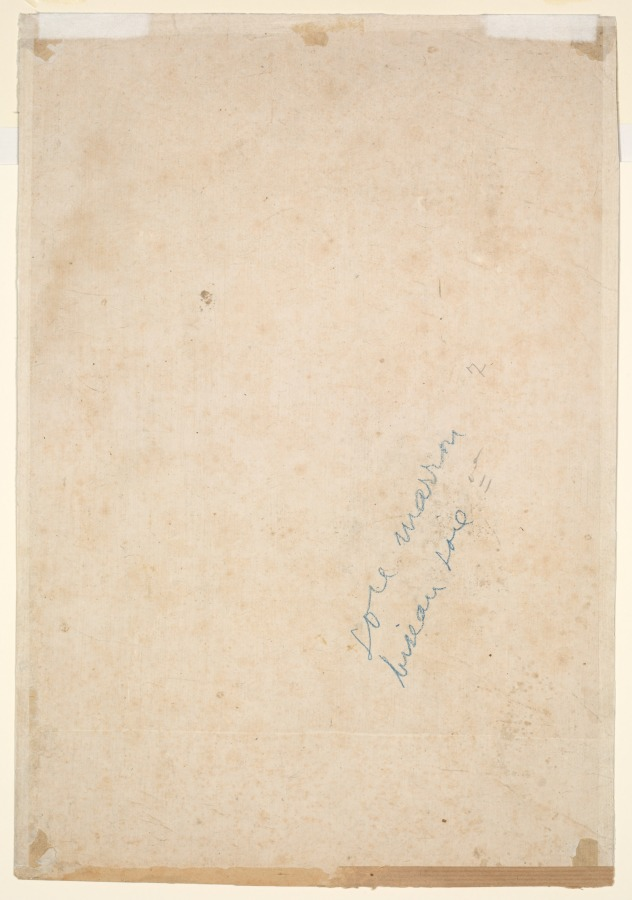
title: Shah Jahan holding a spinel and a long Deccan sword, from the Late Shah Jahan Album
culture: India, Mughal, 17th century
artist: attributed to Hashim (Indian, active 1598-c.1650)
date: c. 1650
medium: Gum tempera and gold on paper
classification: Painting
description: This page came from an imperial album assembled for Shah Jahan toward the end of his reign. Only portraits of the emperors have angels hovering with a crown in the top border along with the predator peacefully paired with his prey below. Shah Jahan chose to link these symbols of peace and justice with divine sanction for his rule, as indicated by the light of the sun and moon behind his head. Royal retainers carry emblems of sovereignty in the left border. Imperial Mughal painting reached a pinnacle of refinement and formality under Shah Jahan. The artists reveal astonishing skill in their ability to render the subtle texture of the feather in his turban crest, the gleam of every jewel, the softness of his beard, and the delicacy of his costly translucent muslin robe. In his hand Shah Jahan holds a ruby-like gemstone called a spinel, prized among the Mughals for its talismanic properties of protection during battle.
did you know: The finest fabric was the most transparent, like the Emperor’s New Clothes.